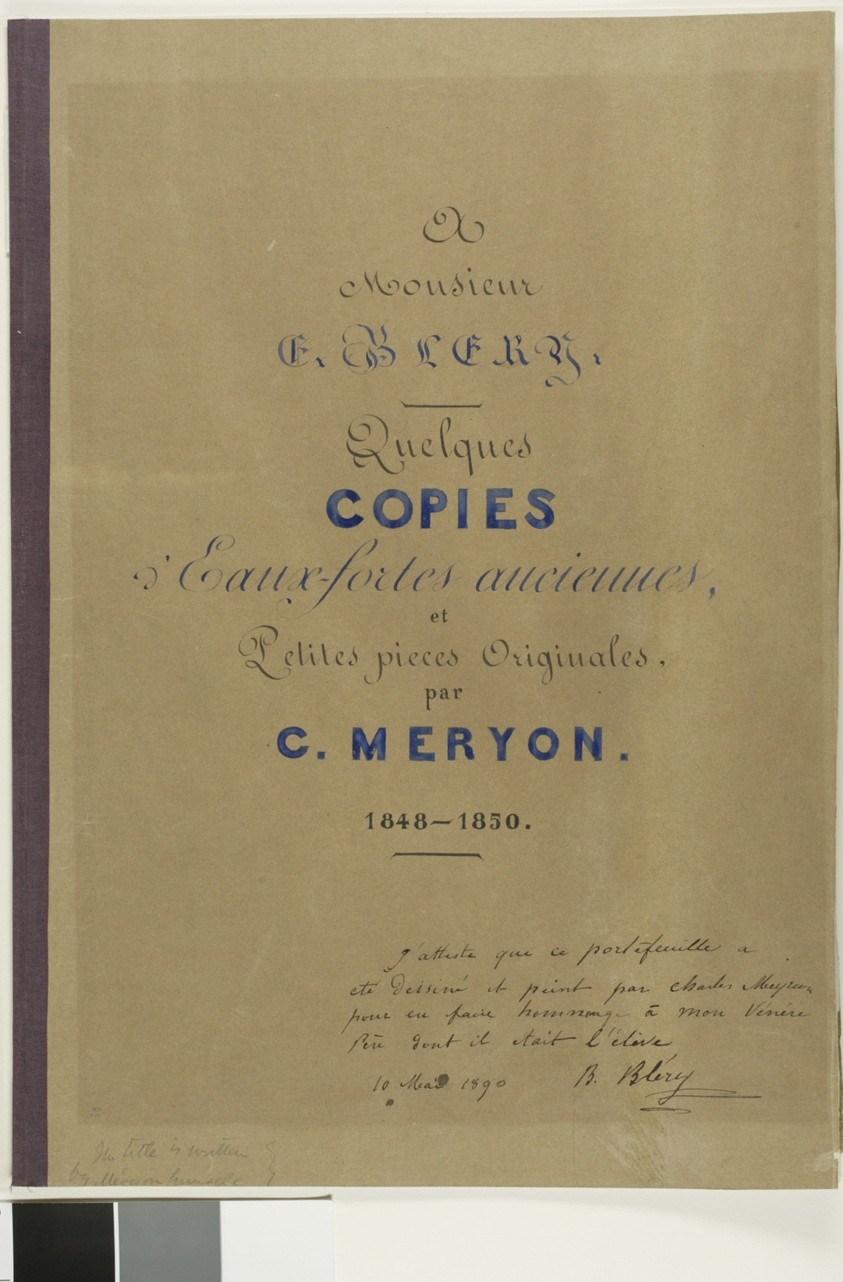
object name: Print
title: Portfolio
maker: Charles Meryon (French, 1821-1868); signed by Eugène Blery (French, 1805-1887)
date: May 10, 1890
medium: Portfolio lettered in ink and color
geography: France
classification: etching; portfolio; prints and drawing; print